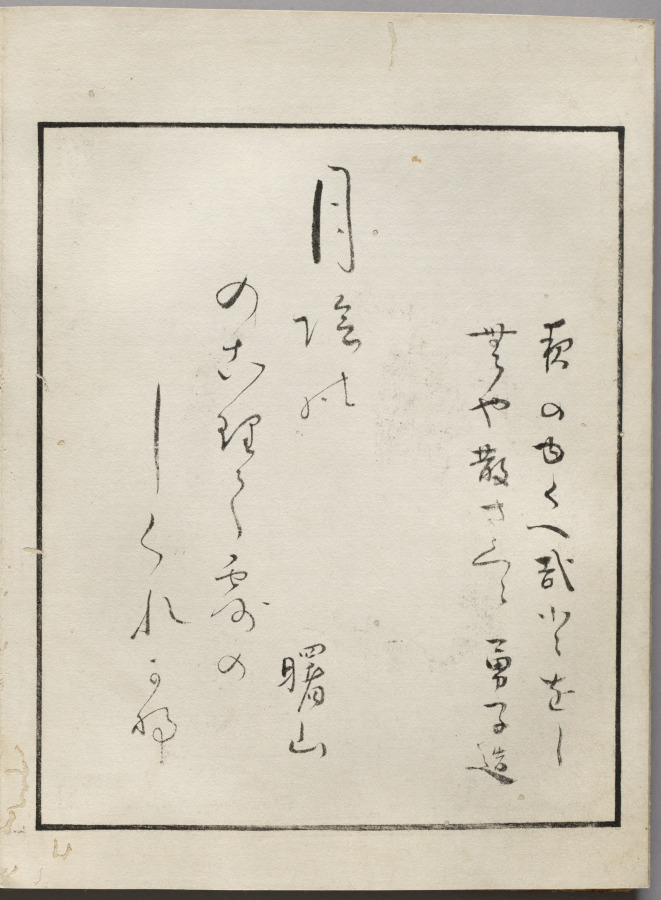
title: Double-Leaf from Album of Actor Portraits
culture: Japan, Edo period (1615–1868)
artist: Shōrakusai (Japanese)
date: c. 1790–1810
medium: double-leaf from an accordion-style album; ink on paper (right) and ink and color on silk (left)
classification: Bound Volume